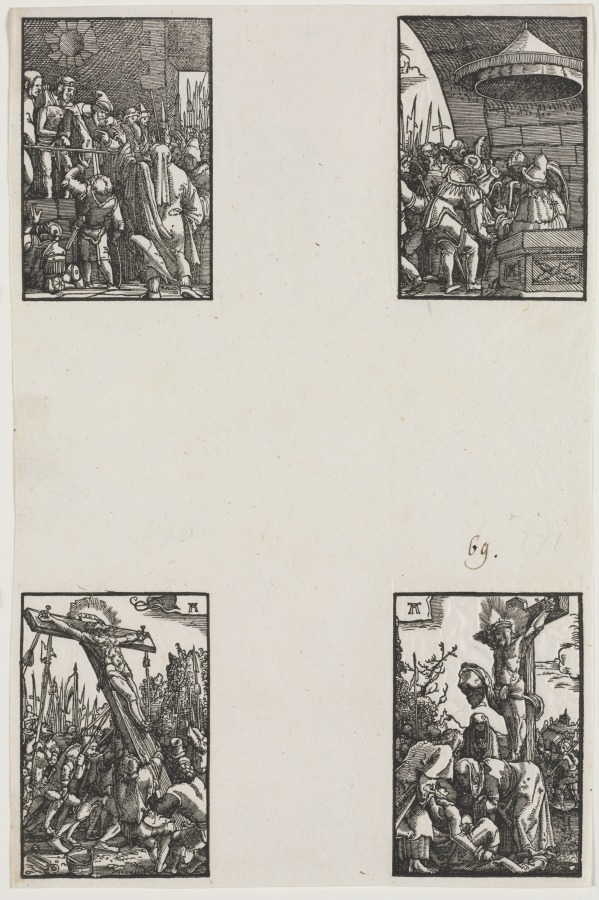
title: The Fall and Redemption of Man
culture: Germany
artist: Albrecht Altdorfer (German, c. 1480–1538)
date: c. 1515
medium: woodcut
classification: Print